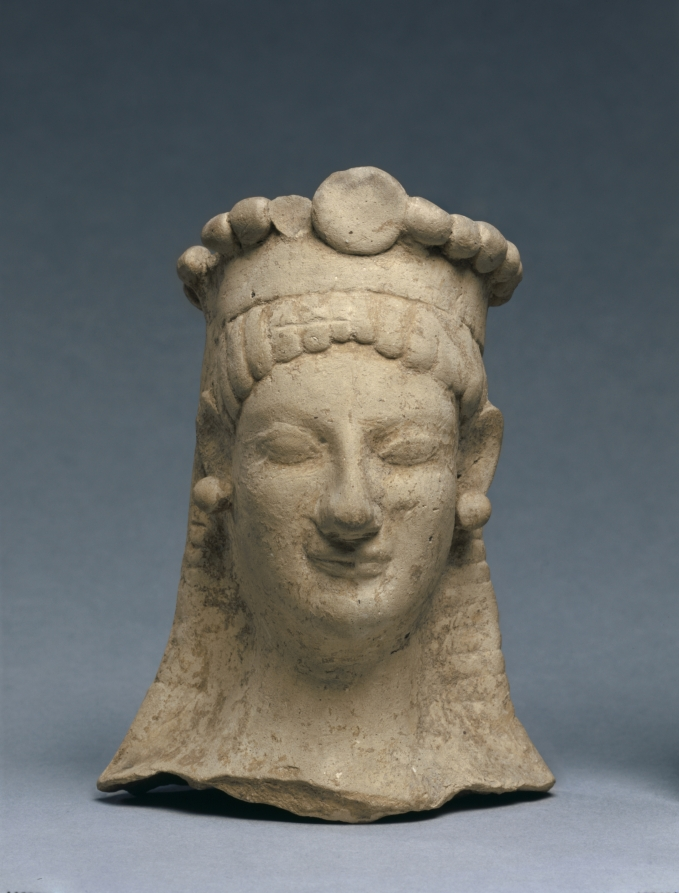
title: Woman's Head with Crown and Earrings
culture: Greece, Sicily(?)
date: 600–475 BCE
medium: terracotta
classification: Sculpture